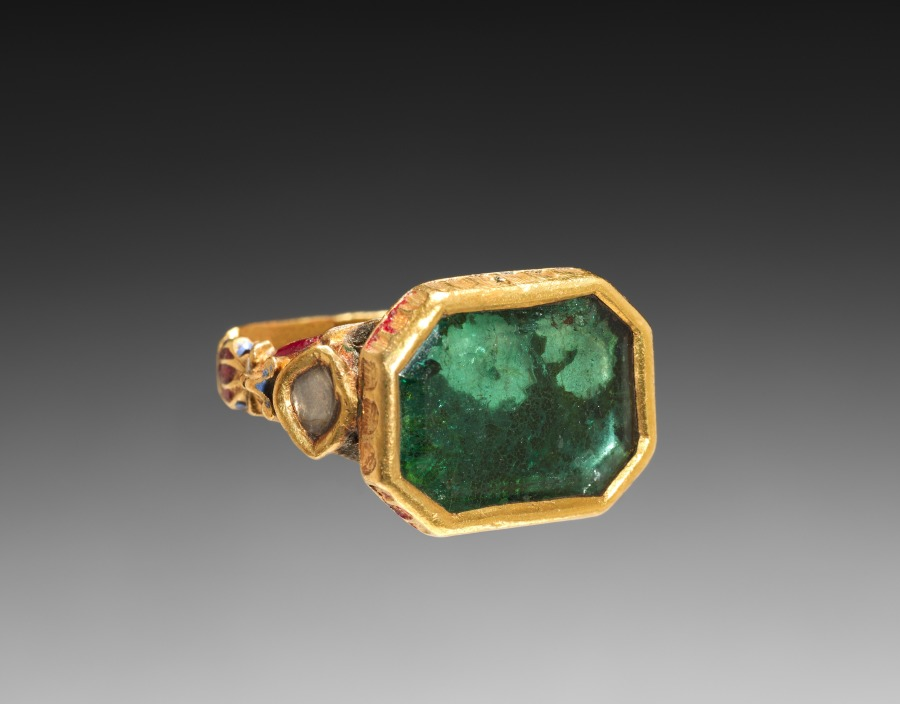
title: Ring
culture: India, Mughal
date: 1700s-1800s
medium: Gold, emerald, glass, silver foil, and enamel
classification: Jewelry